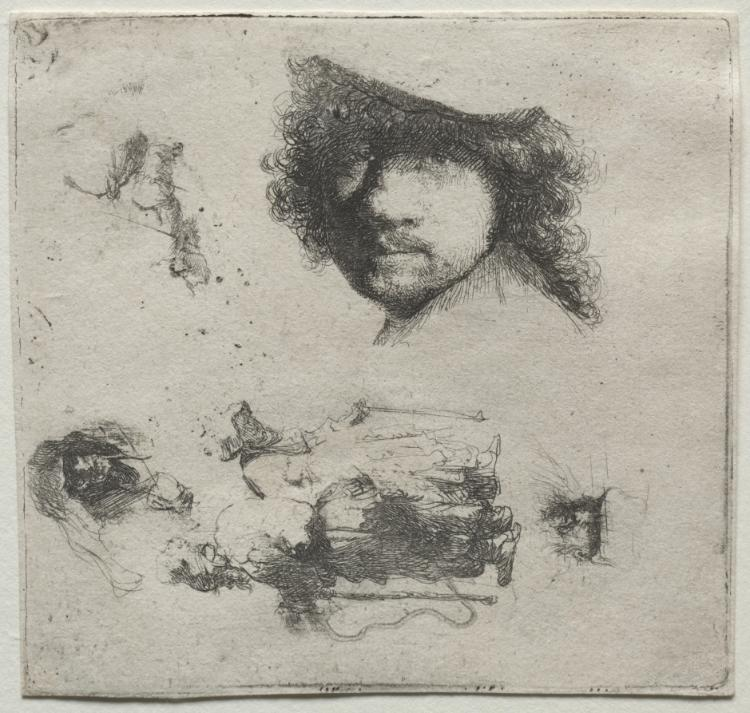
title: Sheet of Studies: Self-Portrait, a Beggar Couple, etc.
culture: Netherlands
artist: Rembrandt van Rijn (Dutch, 1606–1669)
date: c. 1632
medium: etching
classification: Print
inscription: VERSO, center, in graphite: 2 ; center, in graphite: B 363 II / H 90 II ; lower left, in graphite: 19304 ; lower center, in graphite: Prince Liechtenstein / coll ; lower right, in graphite: L [ak?] ; lower right, in graphite: 95[circled]